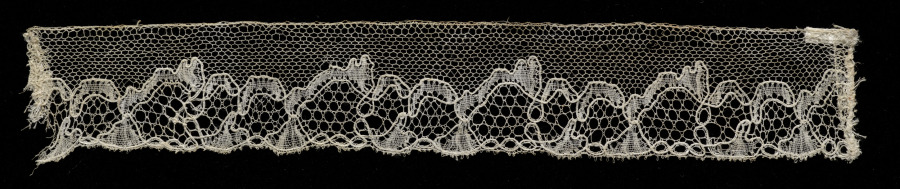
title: Lace Edging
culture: Spain, Seville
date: 1700s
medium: Bobbin lace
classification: Lace